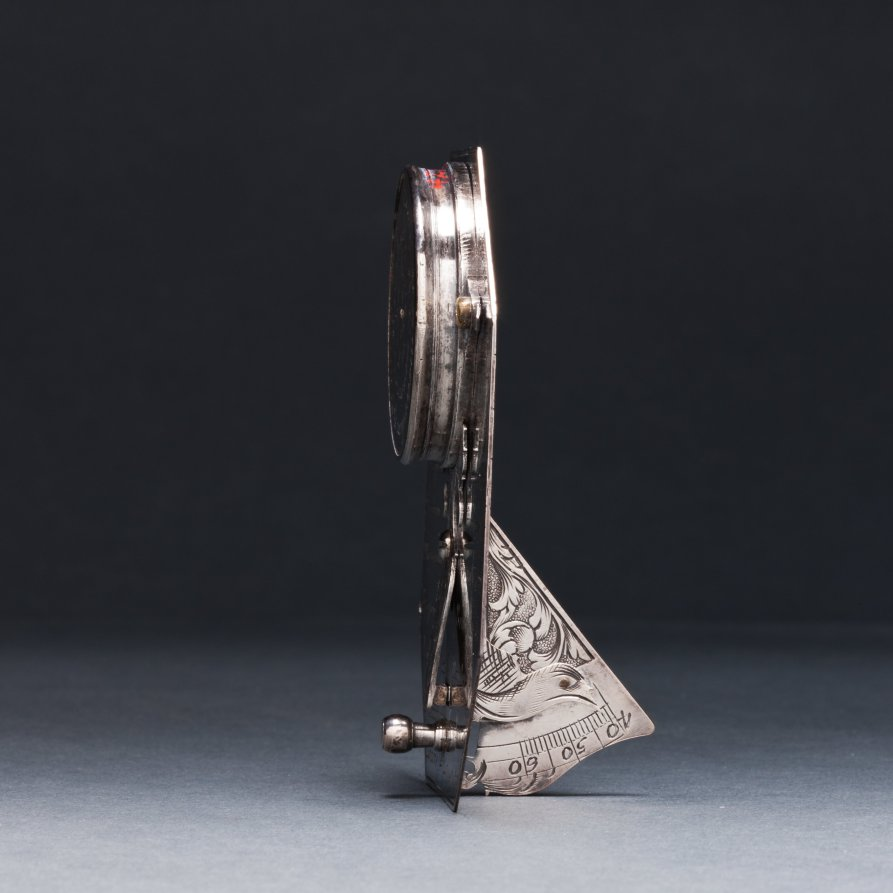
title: Butterfield Sundial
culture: France, 18th century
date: 1700s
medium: silver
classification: Silver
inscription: [Engraved signature above the compass in ribbon band]: "N. BION A Paris"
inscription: [Engraved on the face of the sundial]: “Pour 55° 4-5-6-7-8-9-10-11 50° IIII-V-VI-VII-VIII-IX-X-XI 45° 5-6-7-8-9-10-11 40° -VI-VII-VIII-IX-X-XI'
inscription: [Engraved on the other side]: "Pour 55° -8-7-6-5-4-3-2-1-0 50°-VIII-VII-VI-V-IIII-III-II-I 45°-8-7-6-5-4-3-2-1 40°-VII-VI-V-IIII-III-II-I"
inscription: [Engraved around the compass]: “NORD-OUEST-SUD-EST”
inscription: [Engraved on the back of the sundial]: “Turin 44 Milan 46 Paris 49 Lion 46 Metz 49 Rome 42 Liege 51 Naples 44 Namur 50 Gennes 44 Marseille 43 Grenoble 45 Bayonne 43 Bruxelle 51 Londres 52 Nantes 47 Vienne 48 Toulon 43 Tours 47 Lille 51”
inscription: [Engraved around the back of the compass]: “Venise 45 Strasbourg 49 Amsterdam 52 Hambourg 54 Varsovie 52 La Rochelle 46”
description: Butterfield-type sundials are characterized by their adjustable gnomons, metal flaps that cast a shadow on the dial’s face to indicate the hour, and geographical indices. This sundial has a scale adjustable between latitudes of 40° to 60° north. The latitudes of 26 European towns are engraved on its back for quick reference. With an intricately engraved silver face, it would have functioned as a fashionable traveler’s accessory.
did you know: Butterfield-style sundials were named after Micheal Butterfield, an English scientific and mathematical instrument maker who worked in Paris between 1674 and 1724.